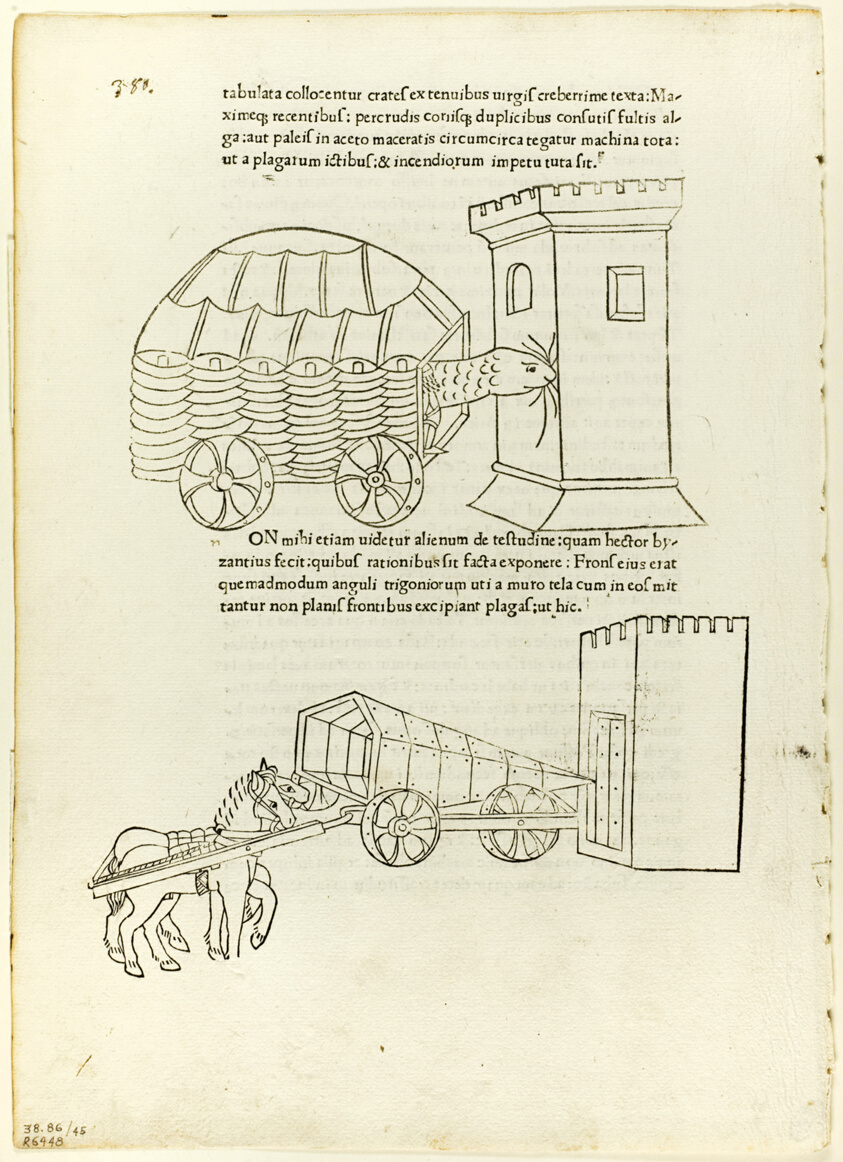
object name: Print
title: Battering Rams from De re militari (Concerning Military Matters), Plate 45 from Woodcuts from Books of the 15th Century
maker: Matteo de' Pasti (Italian, c. 1420-1467/68); printed and published by Johannes Nicolai de Verona (Italian, c. 1405–1475); original text by Robertus Valturius (Italian, 1405–1475); portfolio text by Wilhelm Ludwig Schreiber (German, 1855–1932)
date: 1472, portfolio assembled 1929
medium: Woodcut in black, and letterpress in black (recto and verso), on cream laid paper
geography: Italy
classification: woodcut; print; prints and drawing